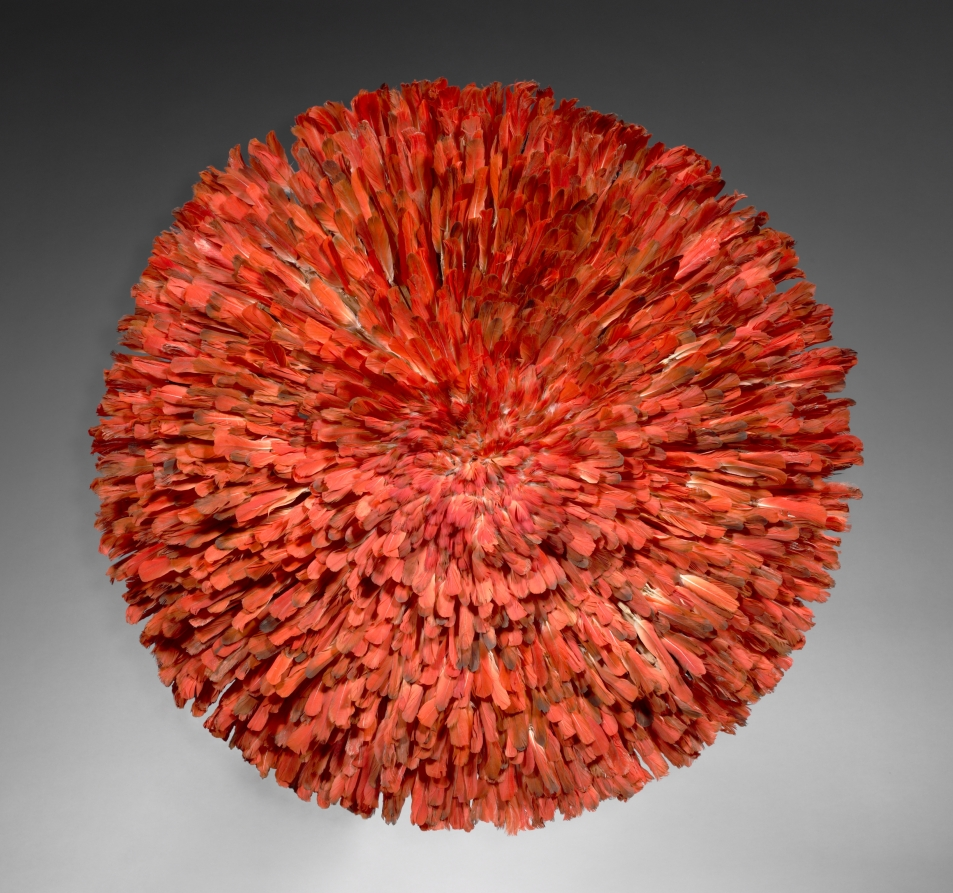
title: Headdress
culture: Africa, Central Africa, Cameroon, Grassfields region, Bamileke-style maker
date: 1900s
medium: African gray parrot feathers, wood, plant fiber, probably cotton, string, and colorant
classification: Garment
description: Hundreds of red tail feathers from the grey parrot (Psittacus erithacus) decorate this disk-shaped headdress. Only the king, some high-ranking individuals, and members of the all-male elephant society—known in different languages as Kuosi, Nekang, or Kem-ndze—wore this prestigious headgear at ceremonies and funerals. Typically, the headdress was worn pushed slightly back from the hairline. When used by members of the elephant society, it was accompanied by a cloth and glass bead mask (mbap mteng) in the shape of that animal, such as 1985.1082.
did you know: This headdress has an ingenious built-in storage system: it can be flipped inside out to encase the feathers within a rigid woven structure, protecting them during storage or travel.